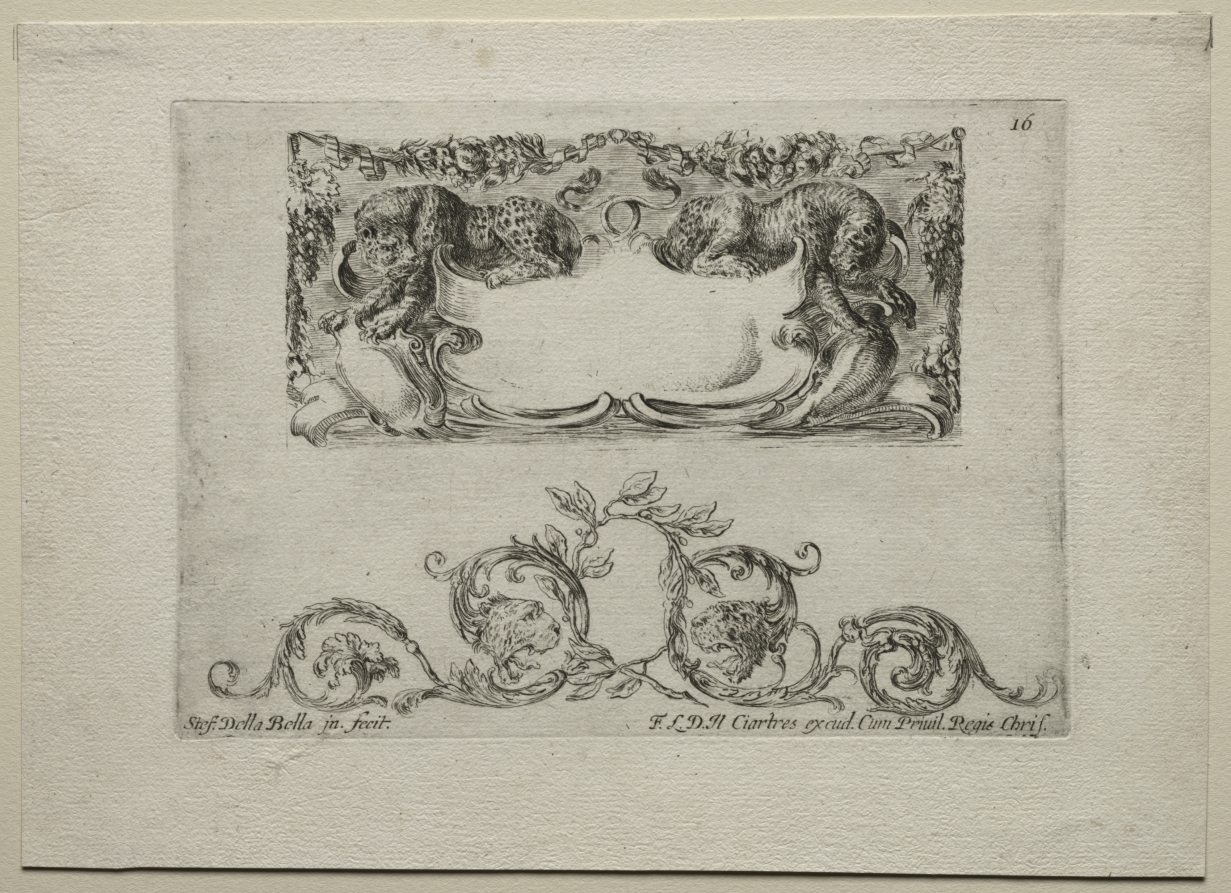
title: Collection of Various Caprices and New Designs of Cartouches and Ornaments: No 16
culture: Italy, 17th century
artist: Stefano Della Bella (Italian, 1610–1664)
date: 1646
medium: etching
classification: Print